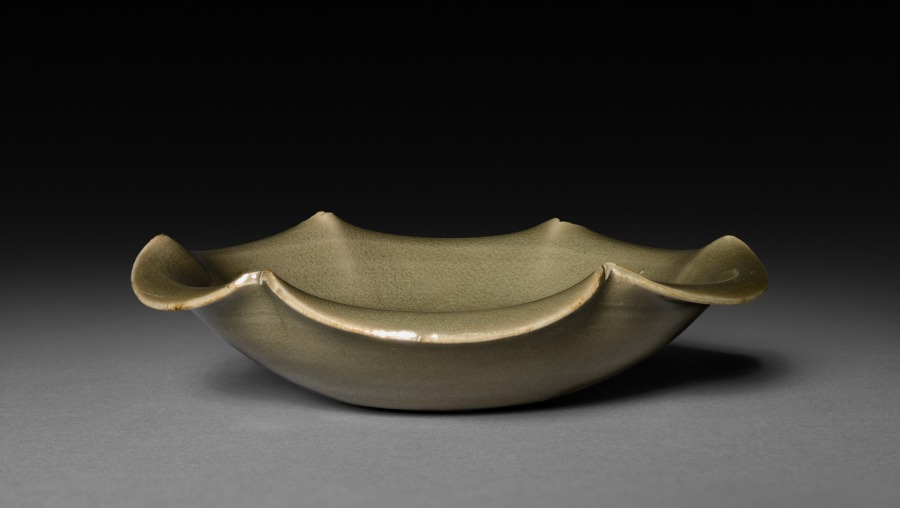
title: Foliated Saucer: Yaozhou Ware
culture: China, Shaanxi province, Northern Song dynasty (960-1127)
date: late 1000s-early 1100s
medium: glazed porcelain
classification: Ceramic